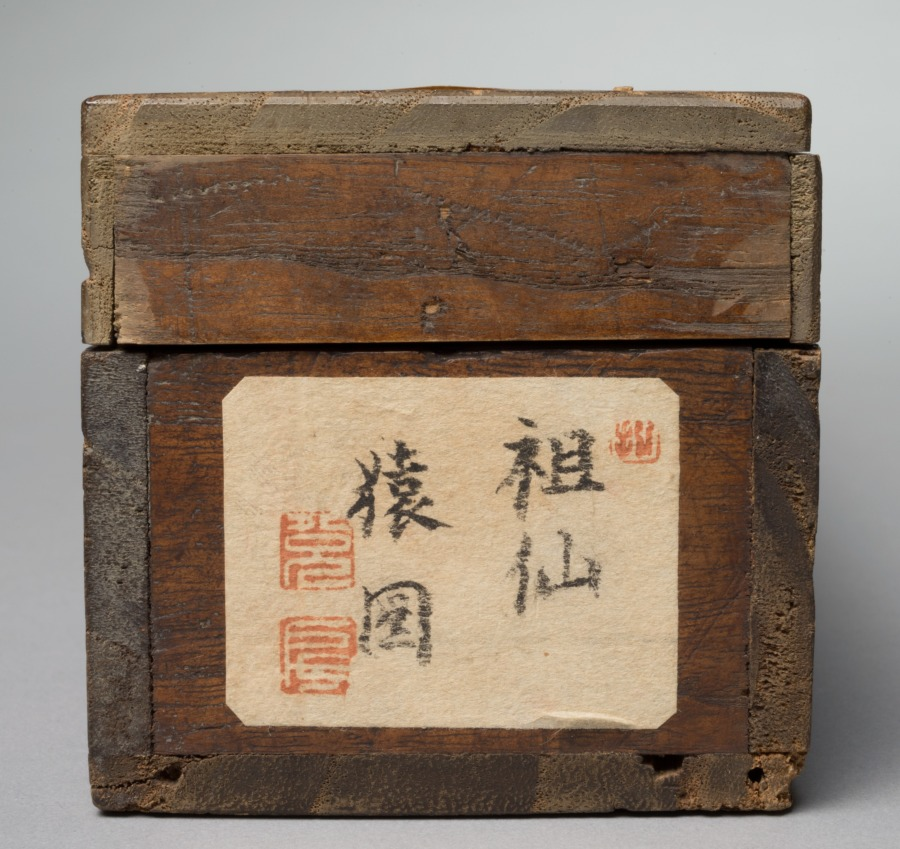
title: Monkey Hanging on to a Branch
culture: Japan, Edo period (1615–1868)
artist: Mori Sosen (Japanese, 1747–1821)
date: 1780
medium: hanging scroll; color on paper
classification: Painting